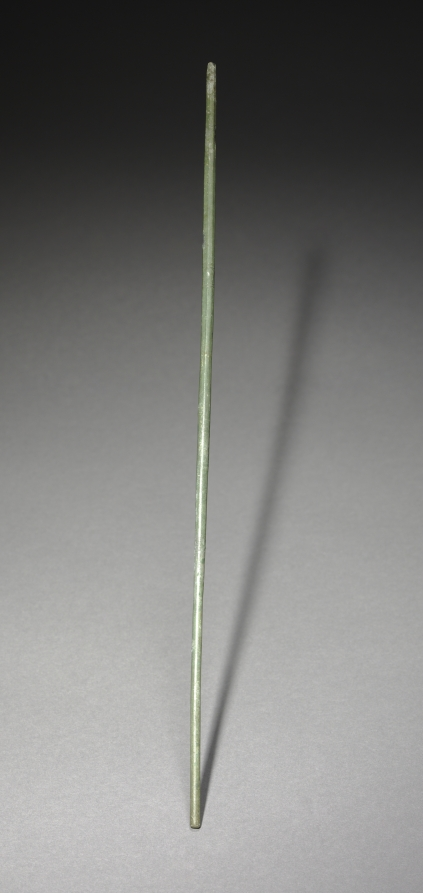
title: Chopstick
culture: Korea, Goryeo dynasty (918–1392)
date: 918–1392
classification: Metalwork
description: In Korea, chopsticks made of metal such as brass, silver, and gold were excavated from ancient tombs and ruins dated to the 6th century at the earliest. Burial goods often include utilitarian objects such as table wares and utensils because the dead were believed to need them in the afterlife.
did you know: In contrast to the Chinese and Japanese, Koreans still prefer metal chopsticks (stainless steel and brass) to wooden ones.